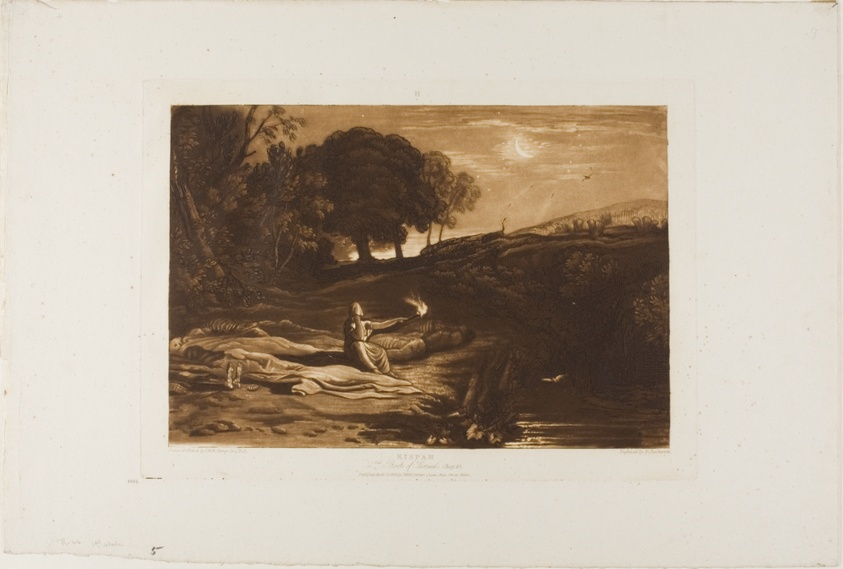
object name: Print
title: Rispah, plate 46 from Liber Studiorum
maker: Joseph Mallord William Turner (English, 1775-1851); engraved by Robert Dunkarton (English,1744–1811)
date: published April 23, 1812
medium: Mezzotint and etching in brown on ivory wove paper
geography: England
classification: etching; print; prints and drawing